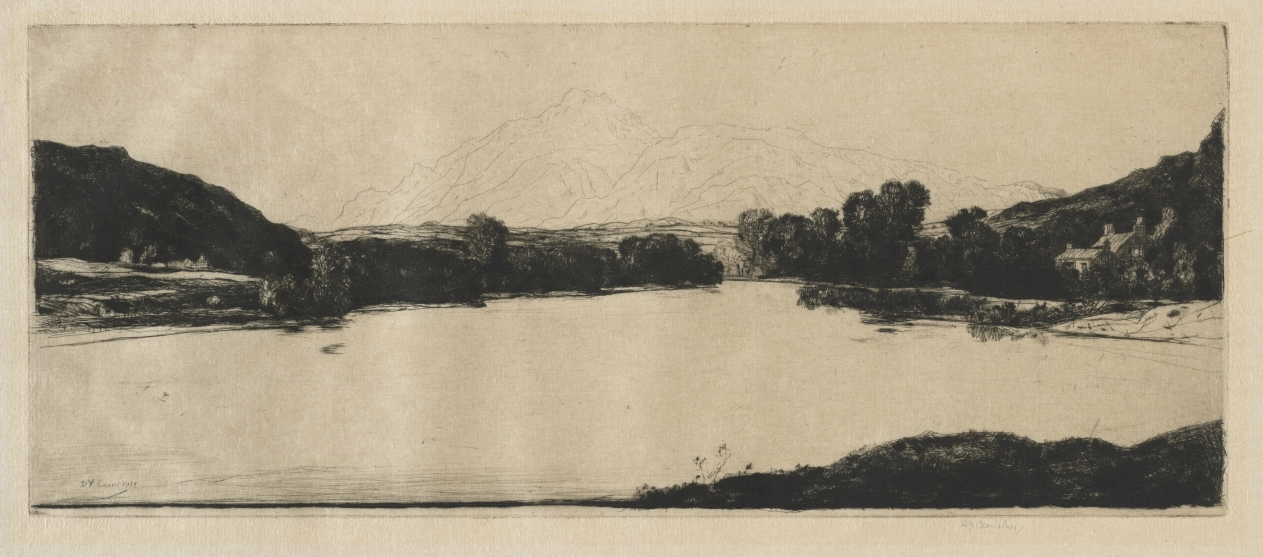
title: Glen Strae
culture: England, 20th century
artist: David Young Cameron (British, 1865–1945)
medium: etching and drypoint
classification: Print